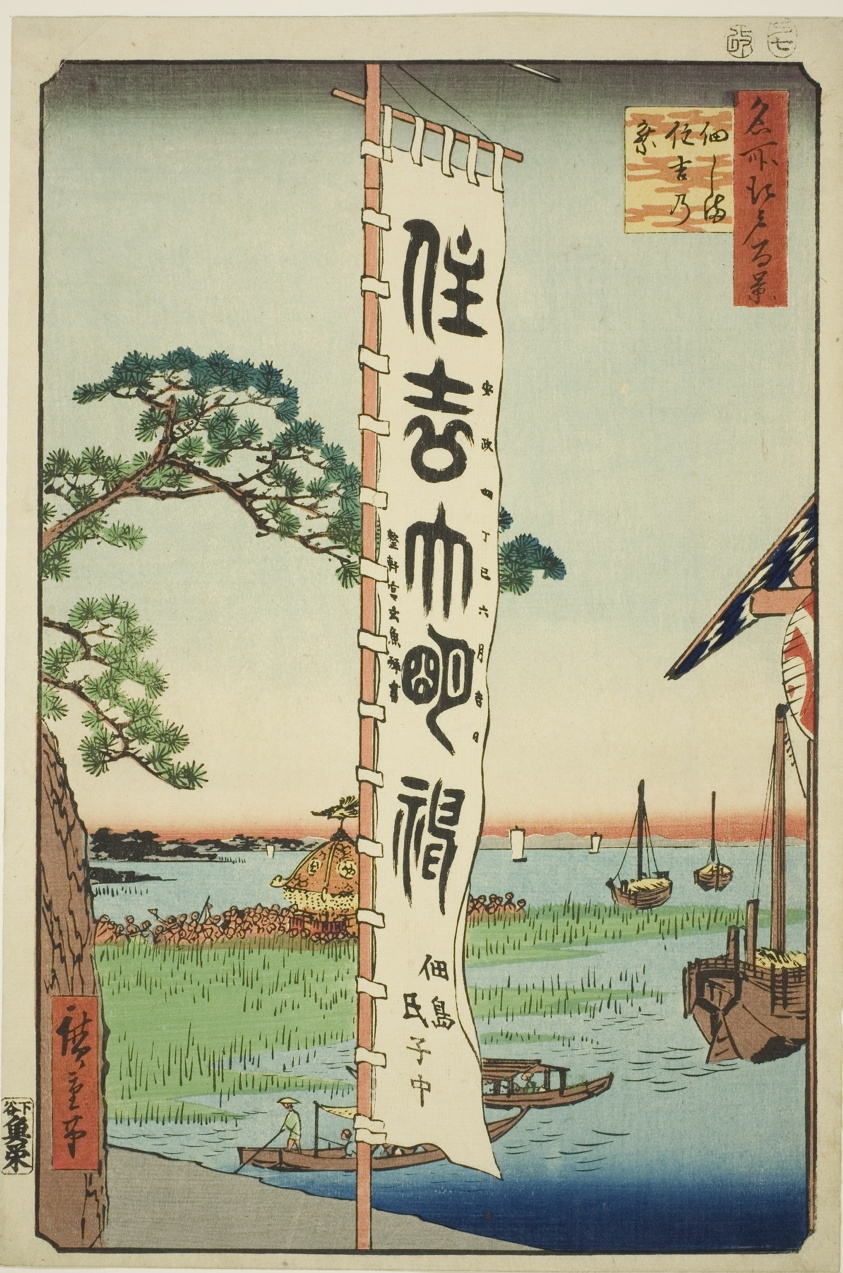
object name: Print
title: Sumiyoshi Festival at Tsukuda Island (Tsukudajima Sumiyoshi no matsuri), from the series "One Hundred Famous Views of Edo (Meisho Edo hyakkei)"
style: Japanese (culture or style)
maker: Utagawa Hiroshige 歌川 広重; Japanese, 1797-1858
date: 1857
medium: Color woodblock print; oban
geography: Japan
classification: woodblock print; print; asian art